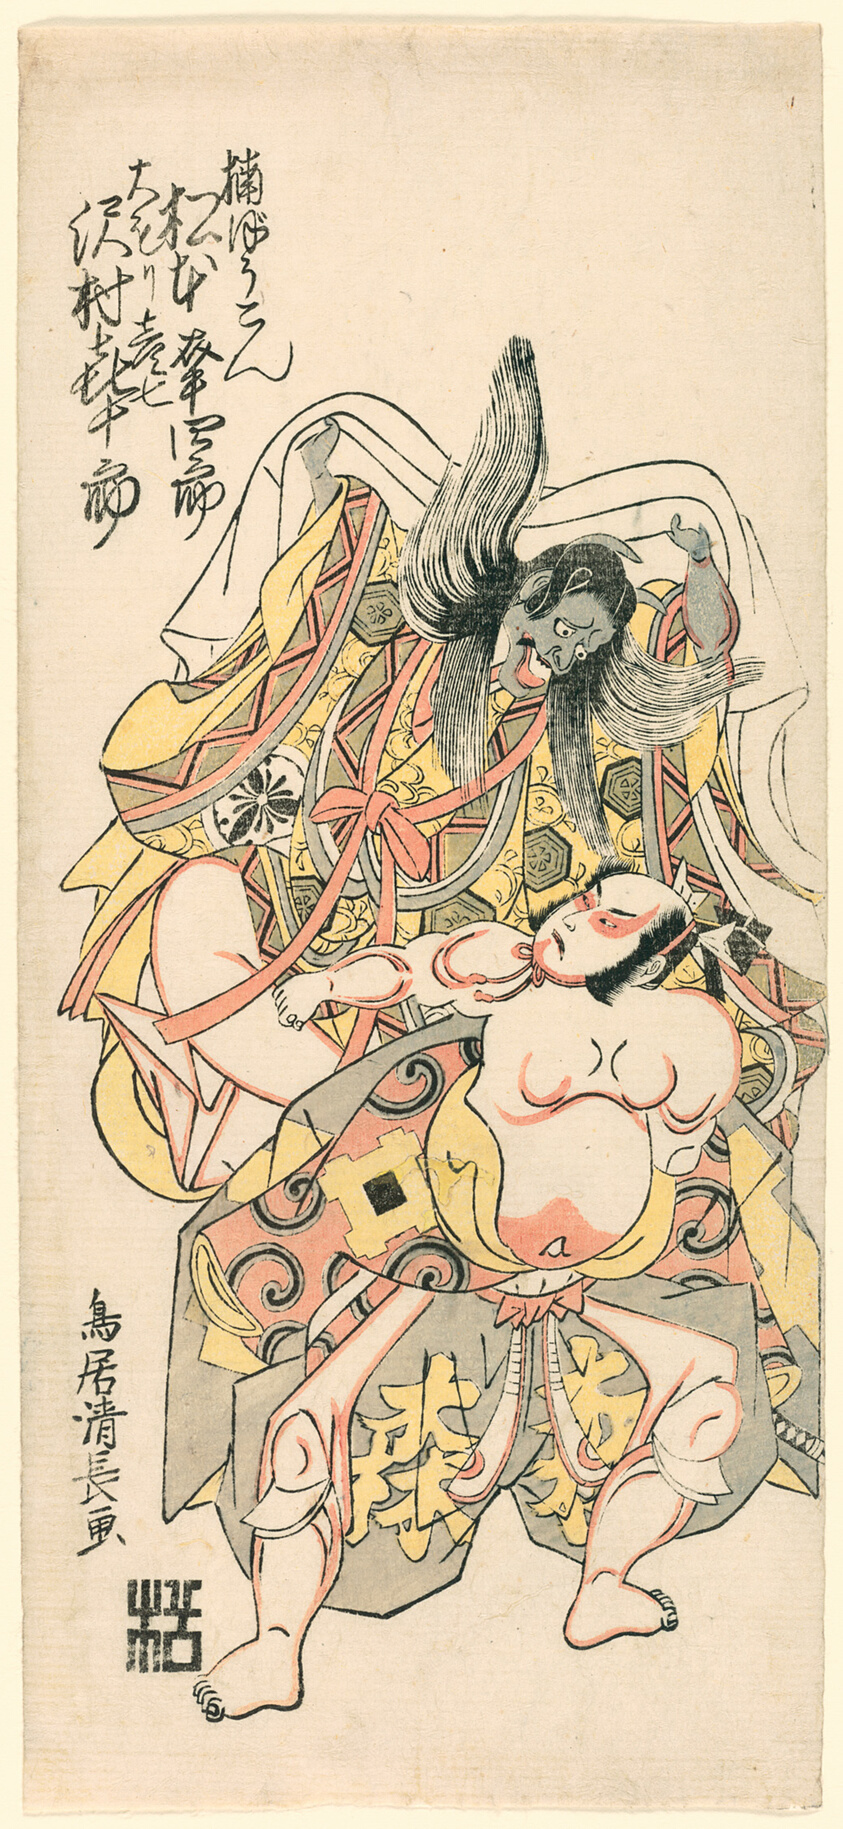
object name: Print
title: Matsumoto Koshiro III as Kusunoki Bokon and Sawamura Kijuro as Omori Hikoshichi in the Scene from a Drama (Sandaime Matsumoto Koshiro no Kusunoki Bokon to Sawamura Kijuro no Omori Hikoshichi)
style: Japanese (culture or style)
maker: Torii Kiyonaga (Japanese, 1752-1815)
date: 1773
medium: Color woodblock print; hosoban, benizuri-e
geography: Japan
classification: woodblock print; print; asian art